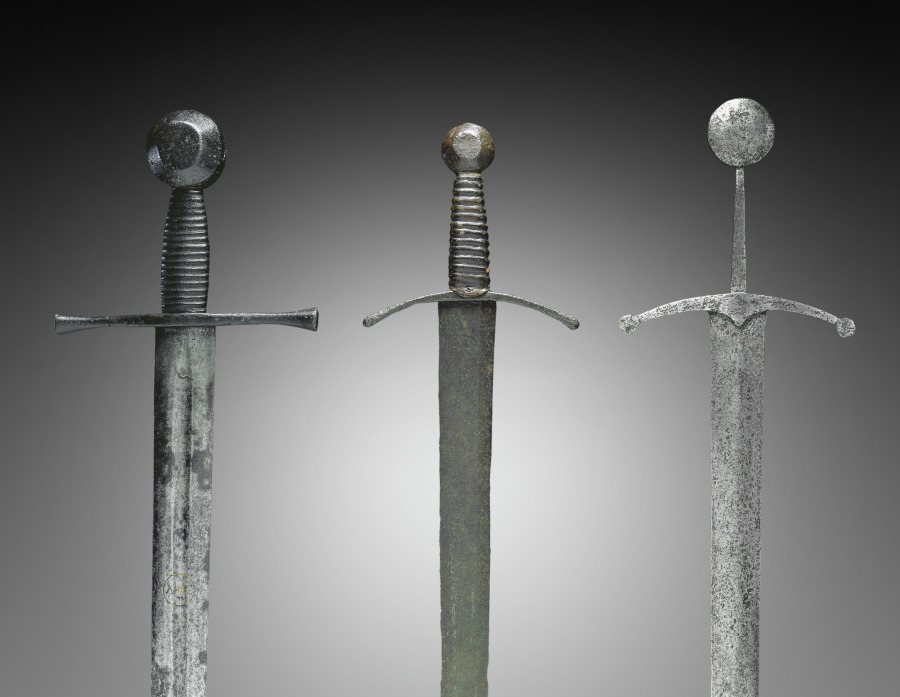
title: Sword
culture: Germany (?)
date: 1400s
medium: steel; wood and leather grip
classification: Arms and Armor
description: During medieval times, everyday objects carried deep spiritual meanings. The knight's sword was perceived as the noblest of weapons because its shape symbolized the cross on which Christ died.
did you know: The unornamented surfaces and signs of use on this sword and those similar to it lead us to believe that they were used in battle. Despite their utilitarian purpose, the blacksmith added details to the handles and hilts to make them visually appealing.